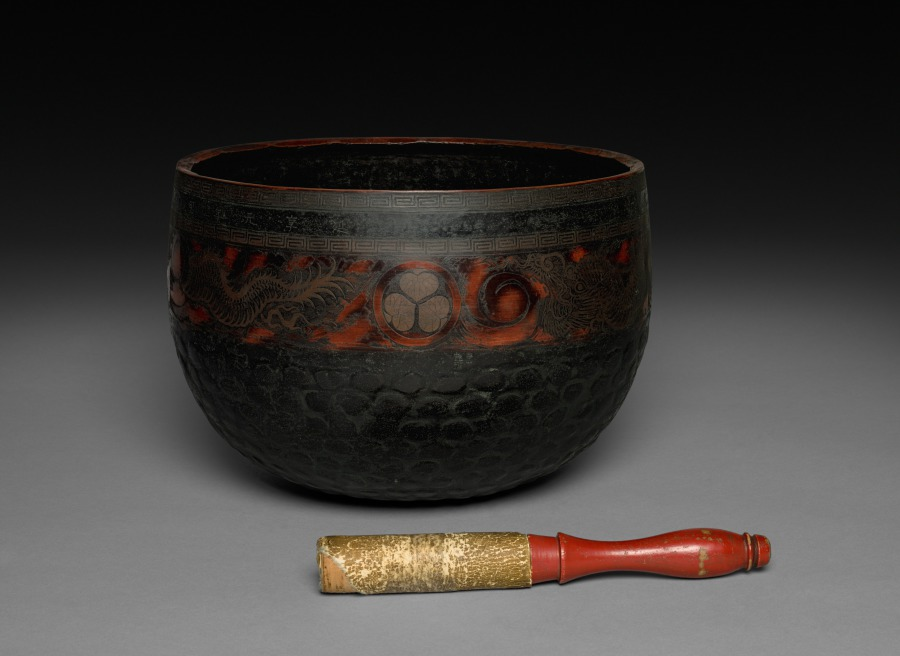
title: Gong and Gong Beater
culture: Japan, Edo period (1615–1868)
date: early to mid-1800s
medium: bronze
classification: Metalwork